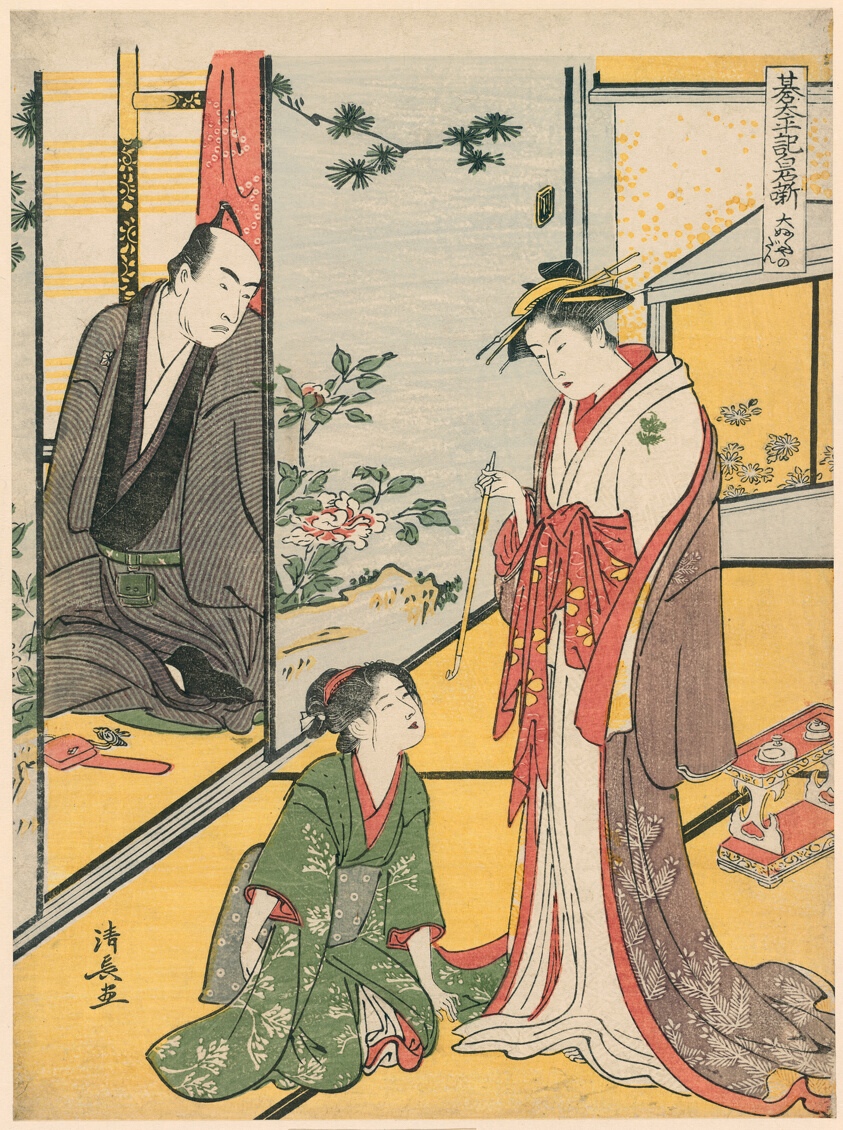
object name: Print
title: Scene at the Daifukuya (Daifukuya no dan), from the series "Go Taiheiki Shiraishi Banashi"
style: Japanese (culture or style)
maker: Torii Kiyonaga (Japanese, 1752-1815)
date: 1785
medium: Color woodblock print; chuban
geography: Japan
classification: woodblock print; print; asian art